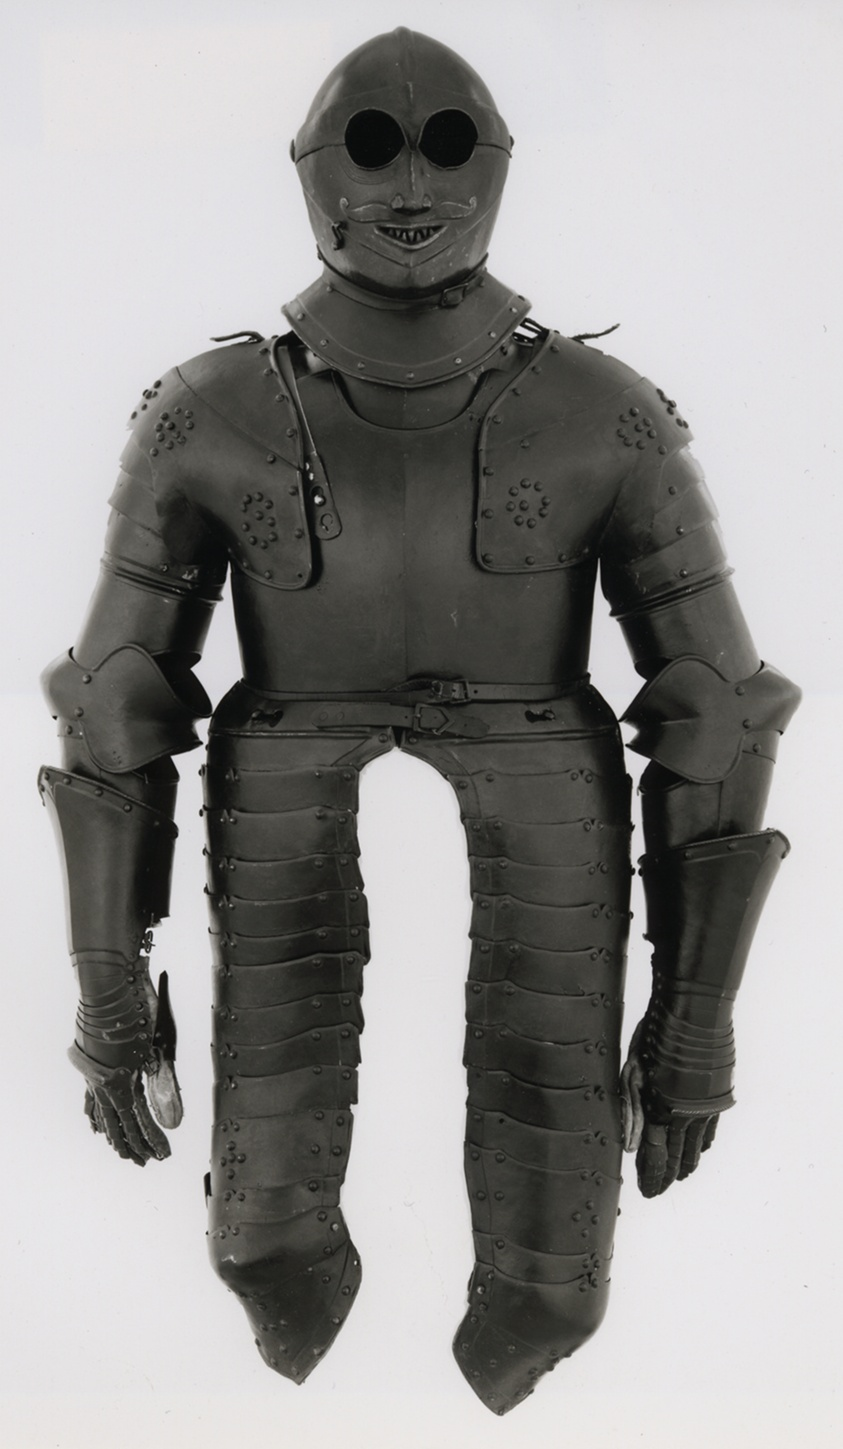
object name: Armor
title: Composite Armor for Heavy Cavalry (Cuirassier)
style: 17th Century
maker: South German, Nuremberg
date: 1620-40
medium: Steel, leather, and paint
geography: Nuremberg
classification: armor; suit; arms and armor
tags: armor